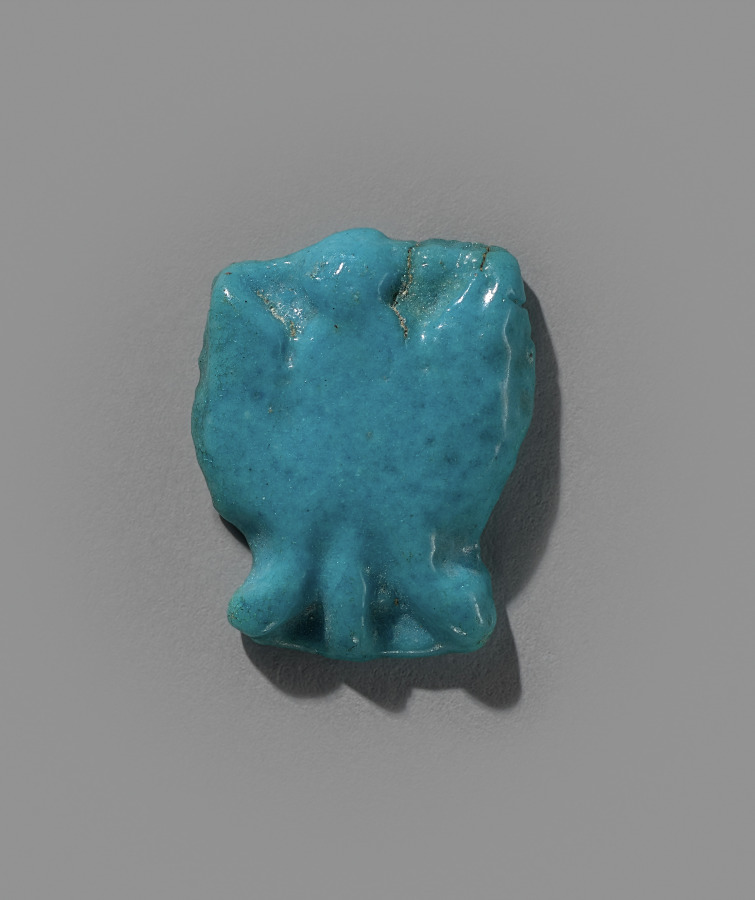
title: Food Model Amulet: Brace of Duck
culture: Egypt, New Kingdom (1540–1069 BCE), Dynasties 19–20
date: 1295–1069 BCE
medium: turquoise faience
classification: Amulets